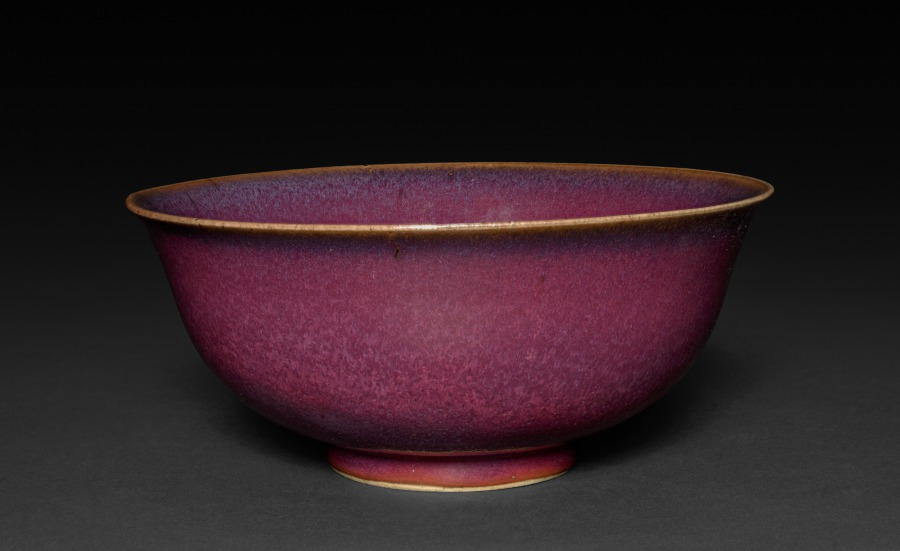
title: Bowl: Jun ware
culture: South China, Yuan dynasty (1271-1368) - Ming dynasty (1368-1644)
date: 14th-15th Century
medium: glazed gray stoneware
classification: Ceramic